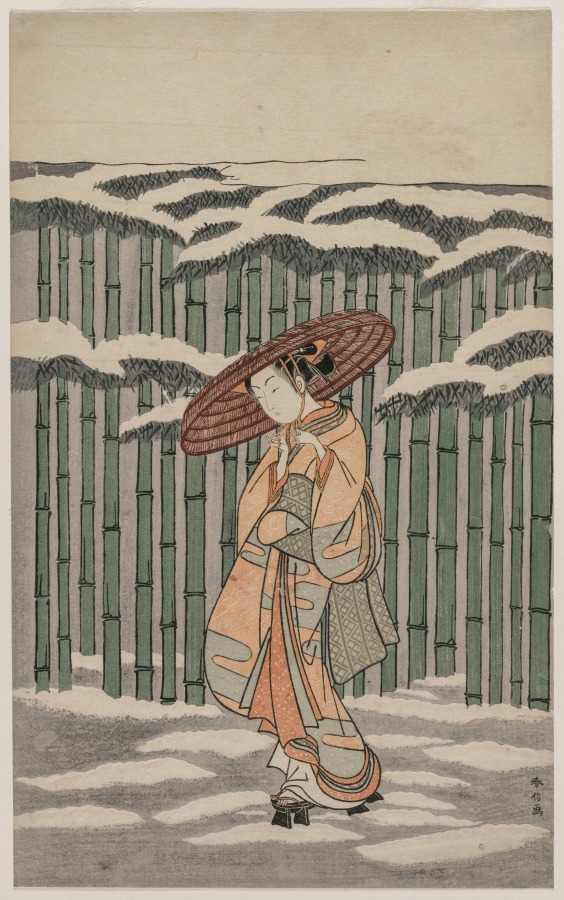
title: Passing the Bamboo Grove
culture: Japan, Meiji period (1868–1912)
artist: Suzuki Harunobu (Japanese, 1724–1770)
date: 1868–1912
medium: color woodblock print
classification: Print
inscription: Signature: Harunobu ga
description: The young woman in this print likely stands in for Meng Zong, one of the Chinese Twenty Four Paragons of Filial Piety. Legend has it he went out in the dead of winter to dig bamboo shoots for his aged parents. Harunobu designed a calendar print for the year 1765 with a more explicit allusion to the theme. It shows a young woman actively digging for bamboo shoots. The first state of this print was privately issued as a calendar print for 1766, with the months of the year depicted in the woman's sash. It was illegal to sell any type of calendar without a government license, and a second state with the calendar replaced with a checked pattern was produced so that the print could be sold commercially. This print is several centimeters taller than the original, which together with its bright colors, indicates that it is a later reproduction.